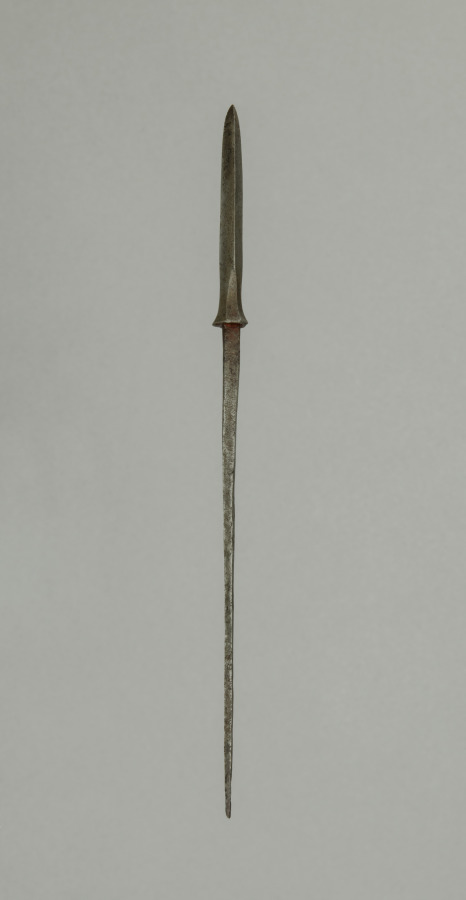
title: Arrow Point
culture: Japan, Edo period (1615–1868)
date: 1700s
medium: steel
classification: Arms and Armor